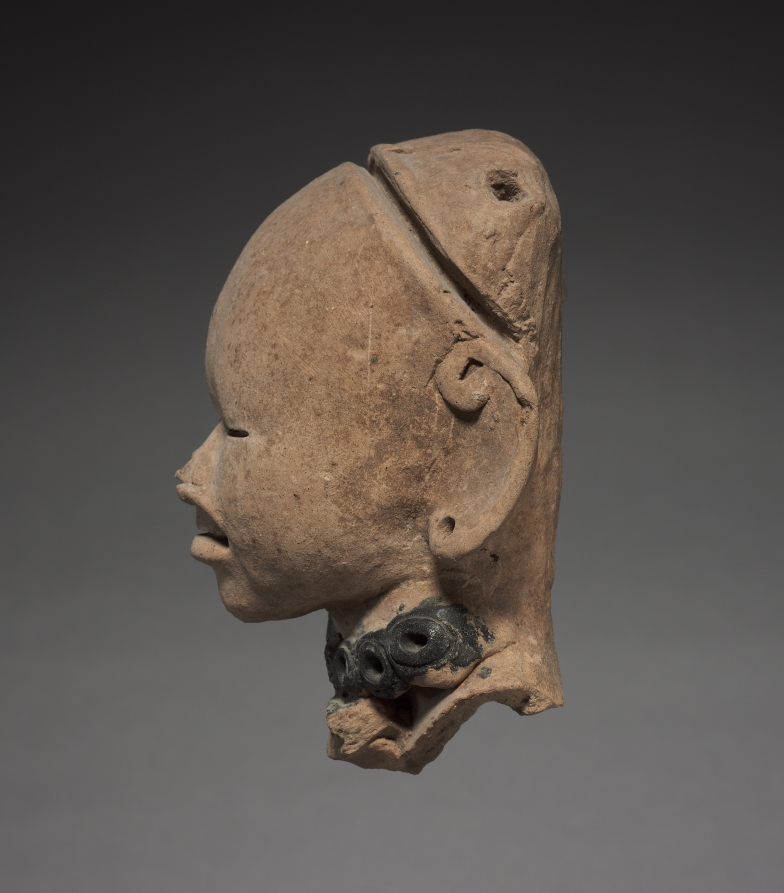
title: Smiling Head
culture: Mexico, Classic Veracruz (Totonac or Tajin)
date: 600–1100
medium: terracotta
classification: Sculpture